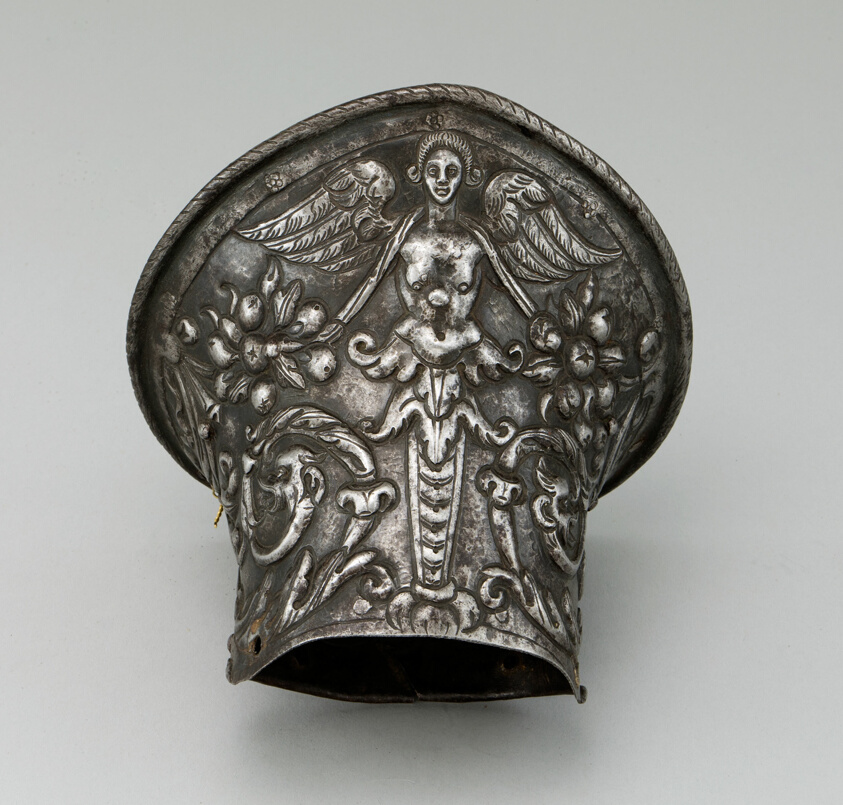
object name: Armor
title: Cuff of a Gauntlet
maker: Italian or Flemish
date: c. 1550/60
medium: Steel, brass, and textile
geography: Italy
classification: suit-gauntlet; armor; arms and armor